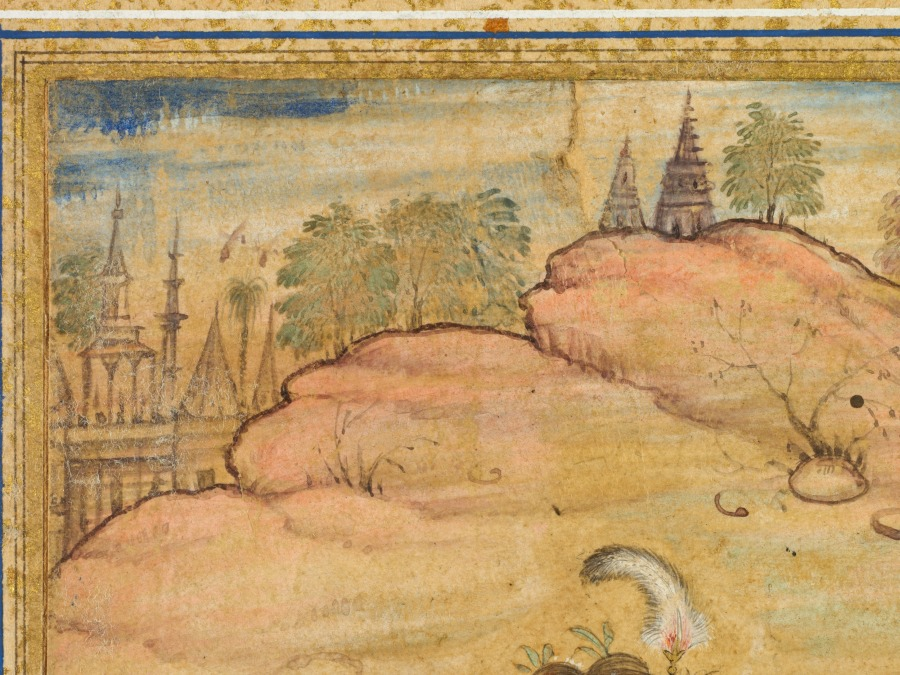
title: A female figure standing in a landscape holding a four-stringed “khuuchir” and a lotus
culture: Mughal India, court of Akbar (reigned 1556–1605)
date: c. 1590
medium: Gum tempera and gold on paper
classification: Painting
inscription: [verso, upper left, sticker] 1027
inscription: [verso, right of sticker, in pencil] 24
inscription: [verso, upper center, in pencil, upside down] VI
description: Standing over flowering sprigs, holding a lotus like a scepter, the figure seems to magically impart fertility to a desert. In pan-Indian religious iconography (system of visual symbols that identify a figure), the lotus is held by the goddess of good fortune, prosperity, and abundance, who is frequently associated with ideal kingship. The stringed instrument recalls the Indian goddess of learning and music, but here it is of a Mongolian type, as is the feather in her crown. Her garments are reminiscent of those worn by biblical and classical figures in European engravings. This painting combines Indian, European, and Mongolian references.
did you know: The four strings of the woman’s khuuchir would have been made from silk.